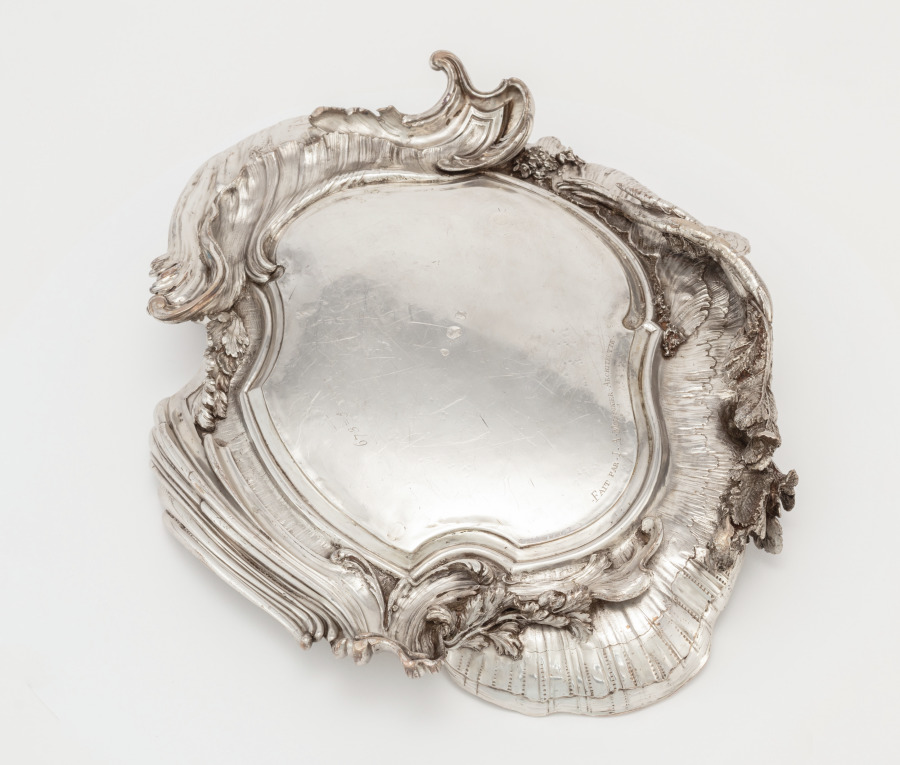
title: Stand for a Covered Tureen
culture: France, Paris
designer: Juste-Aurèle Meissonnier (French, 1695–1750)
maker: Pierre-François Bonnestrenne (French)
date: 1735–38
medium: silver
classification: Silver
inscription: engraved Meissonnier signature.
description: See entry for cover record 1977.182.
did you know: The langoustine, pigeon, and vegetables were cast using real examples giving the silver copies lifelike detail and appearance.